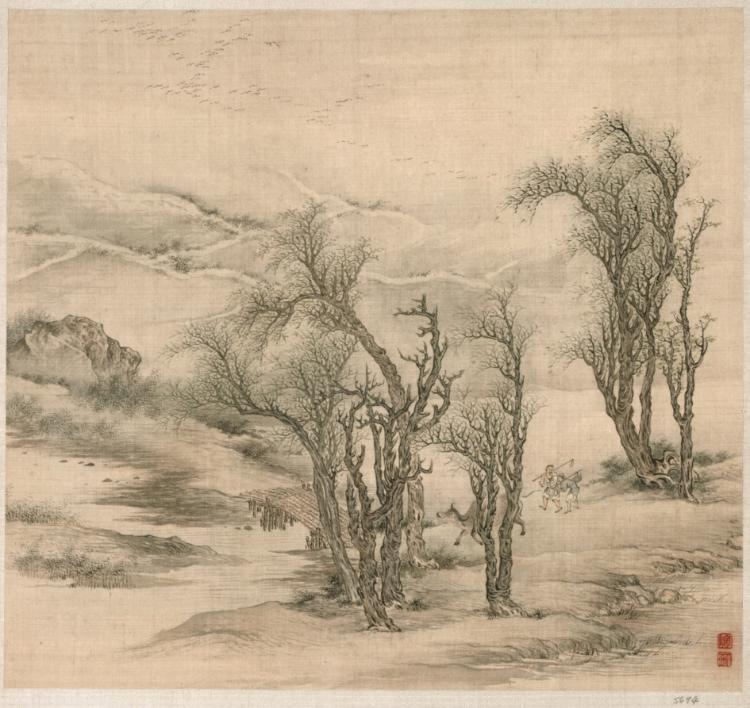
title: Returning Peasants in a Spring Evening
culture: China, Ming dynasty (1368–1644)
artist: Tao Hong (Chinese, active c. 1610–1640)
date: early 1600s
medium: album leaf, ink and color on silk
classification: Painting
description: Although little known today, Tao Hong was a versatile artist who here depicts farmers returning home after a day in the fields. The shallow stream and dormant rice fields, the returning birds, and light sprinkles of green foliage all indicate the beginning of the farming season and hope for a good harvest. While this leaf depicts rural life, the second one,1999.224, is of a more poetic nature. A lone crane stands in a bamboo grove. By using light colors and nuanced brushwork, Tao Hong achieves an effect of natural light and luminosity.